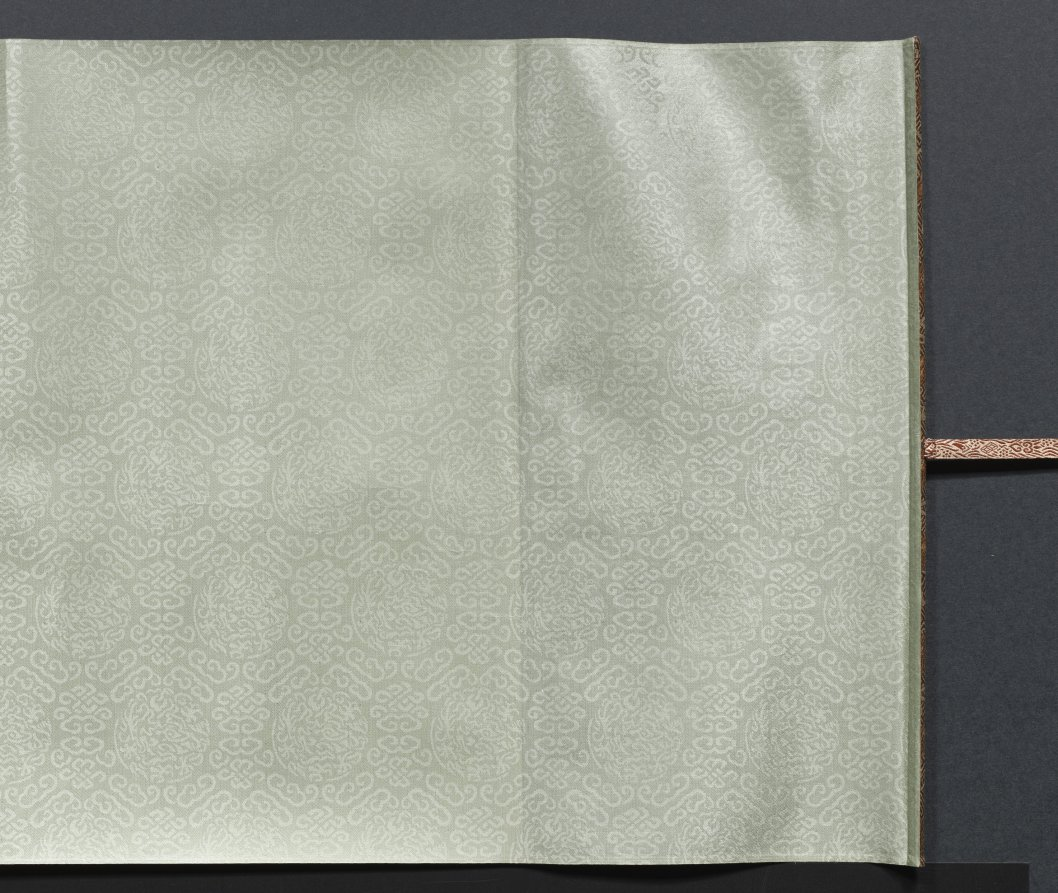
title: Calligraphy in Running Style based on Wang Bo's Essay on Tengwang Pavilion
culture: China, Changbai, Qing dynasty (1644-1911)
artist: Tiebao (Chinese, 1752–1824)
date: 1811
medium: handscroll, ink on paper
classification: Calligraphy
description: A member of the Donggo clan, Tiebao belonged to the Manchu Plain Yellow Banner army. As an official in the Qing court, he endured considerable vicissitude and his career was never smooth. Celebrated as a man of letters, he oversaw the publications of the Manchu military system as well as an anthology of poems by members of the imperial family and other Manchu dignitaries. In calligraphy, he was regarded as the equal of such eighteenth-century luminaries as Liu Yong (1720-1805) and Weng Fanggang (1733-1818). This handscroll is a work of his mature years and is exemplary of his disciplined and highly subtle approach to the art of calligraphy.